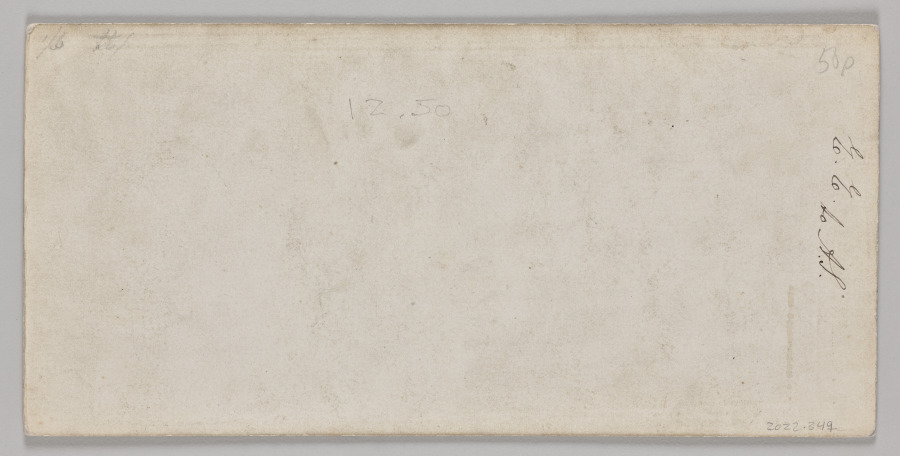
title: No. 1198 Glacier d'Oberaar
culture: France, 19th century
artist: Adolphe Braun (French, 1812–1877)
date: c. 1865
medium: albumen print, stereo card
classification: Photograph